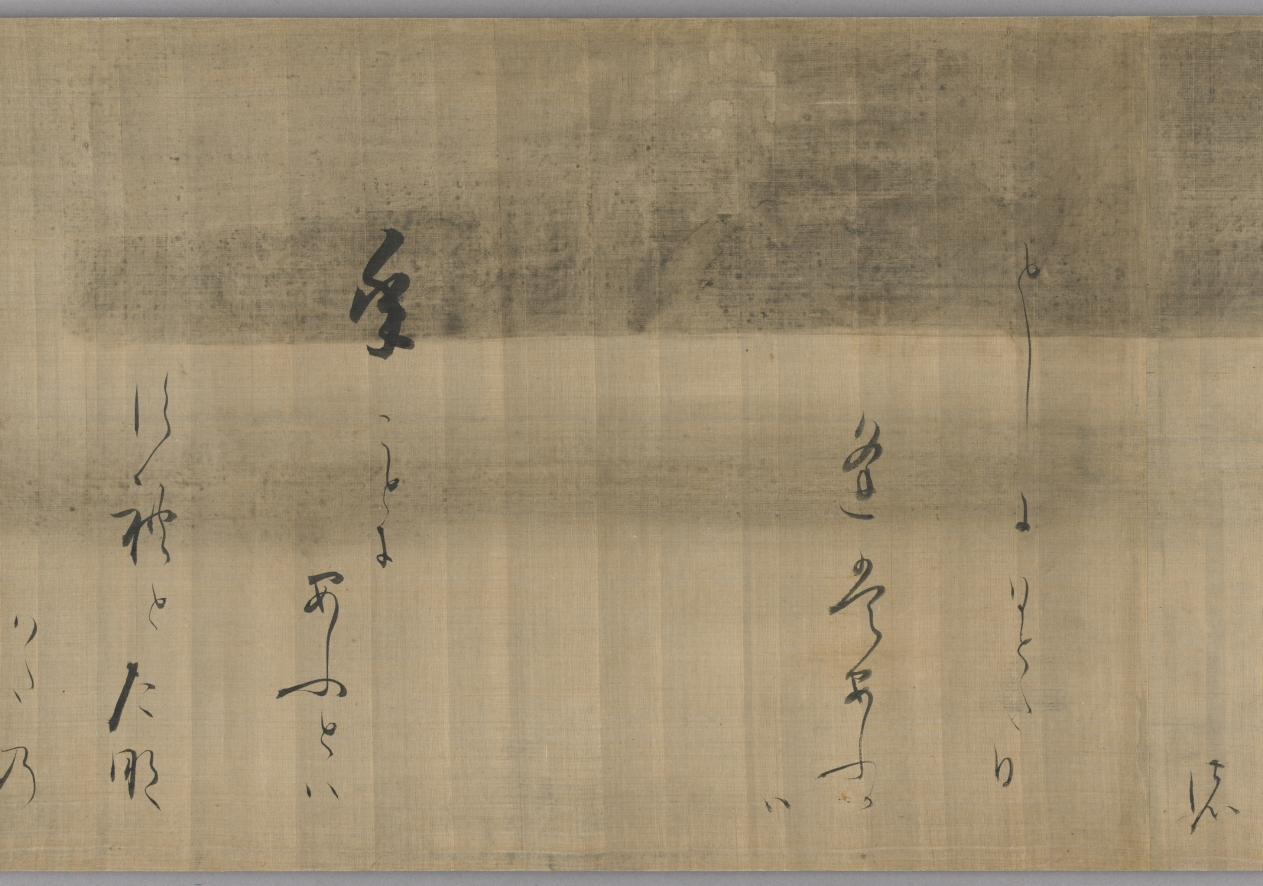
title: Selections from the Collection of Japanese Poems from Ancient and Modern Times (Kokin wakashū) with Design of Pines Along the Shore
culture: Japan, Momoyama period (1573-1615) to Edo period (1615-1858)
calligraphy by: Hon'ami Kōetsu (Japanese, 1558–1637)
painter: attributed to Tawaraya Sōtatsu (Japanese, c. 1570–c. 1640)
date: 1600s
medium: handscroll; ink on silk with gold and silver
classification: Calligraphy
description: The calligrapher and craftsman Hon’ami Kōetsu frequently collaborated with Tawaraya Sōtatsu, a painter who ran a studio that produced fans and screens. Sōtatsu’s work featured abstracted and flattened shapes, fields of color and gold, and asymmetry. In particular, motifs that appeared in small scale, such as flora and fauna, in early decorated Japanese papers were painted in a larger scale—blown up as if seen under a magnifying glass. For this handscroll, Kōetsu brushed poems from the autumn section of a poetry anthology onto silk with a landscape of pines in gold and silver likely painted by Sōtatsu.